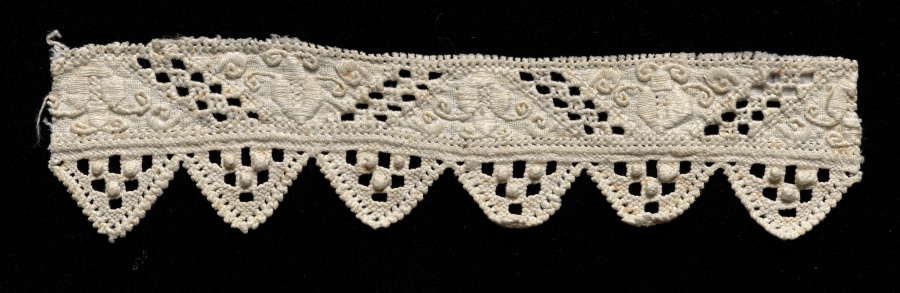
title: Edging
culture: Italy, Venice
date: 1500s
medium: Linen: needle lace (cutwork) insertion and punto avorio lace edging and embroidery; satin stitch (punto reale)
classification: Lace